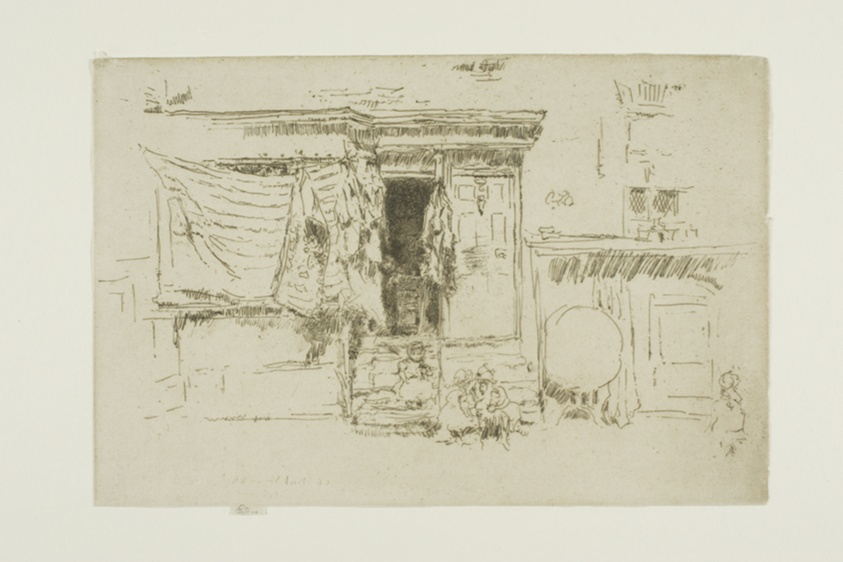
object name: Print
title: Rag Shop, Milman's Row, Chelsea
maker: James McNeill Whistler (American, 1834-1903)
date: 1887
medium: Etching and drypoint with foul biting in black ink on cream laid paper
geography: United States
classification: etching; foul biting; print; prints and drawing; drypoint; paper